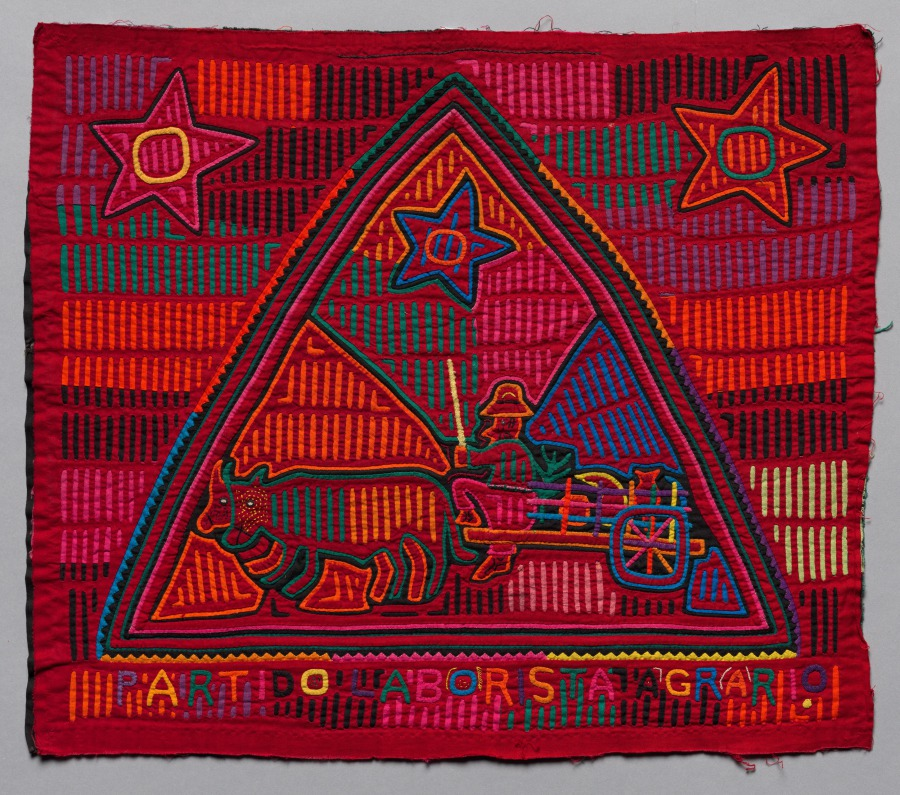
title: Mola Panel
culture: Republic of Panamá, Gunayala Comarca, Guna people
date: mid-1900s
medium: cotton: appliqué, reverse appliqué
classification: Textile